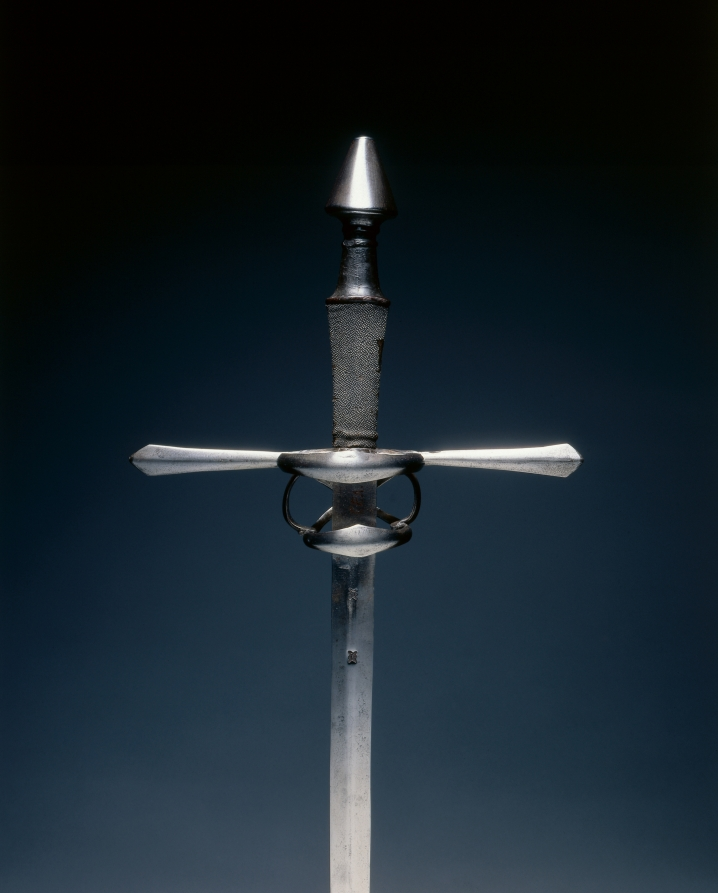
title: Hand-and-a-Half Sword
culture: Germany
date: c.1540–80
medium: steel; wood, leather, sharkskin grip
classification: Arms and Armor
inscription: on blade: CEA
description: A hand-and-a-half sword is a large sword with a double-edged blade and a long grip that, when necessary, could accommodate both hands to wield it. The grip of this sword is made of sharkskin and has been fitted around a wooden core. On the blade are two yet to be identified marks.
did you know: If you are looking for this in the armor court, look up; this sword is part of one of the panoply or decorative arrangements on the wall.